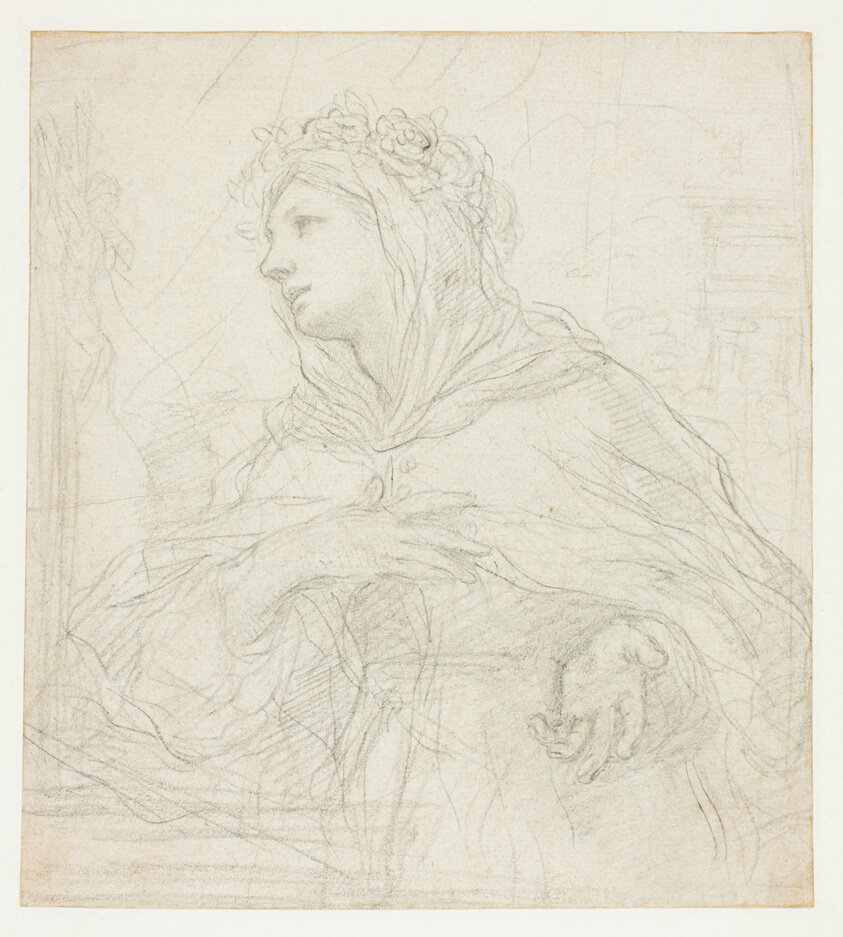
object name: Drawing and Watercolor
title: Study of Santa Rosalia of Palermo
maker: Ciro Ferri (Italian, 1634-1689); influenced by Baldassare Franceschini, called Il Volterrano (Italian, 1611-1690)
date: 1659/64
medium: Black chalk with smudging on ivory laid paper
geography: Italy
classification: chalk; prints and drawing; paper